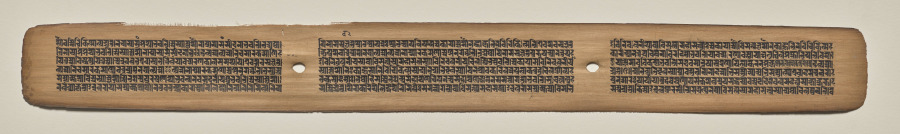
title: Text, Folio 119 (recto), from a Manuscript of the Perfection of Wisdom in Eight Thousand Lines (Ashtasahasrika Prajnaparamita-sutra)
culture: Eastern India, Bihar, Vikramashila Monastery. Painting: Nepal, Kathmandu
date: Sunday, September 14, 1119 (year 239 of the Newar Samvat in the month of Ashvina)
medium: gum tempera and ink on palm leaves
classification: Painting